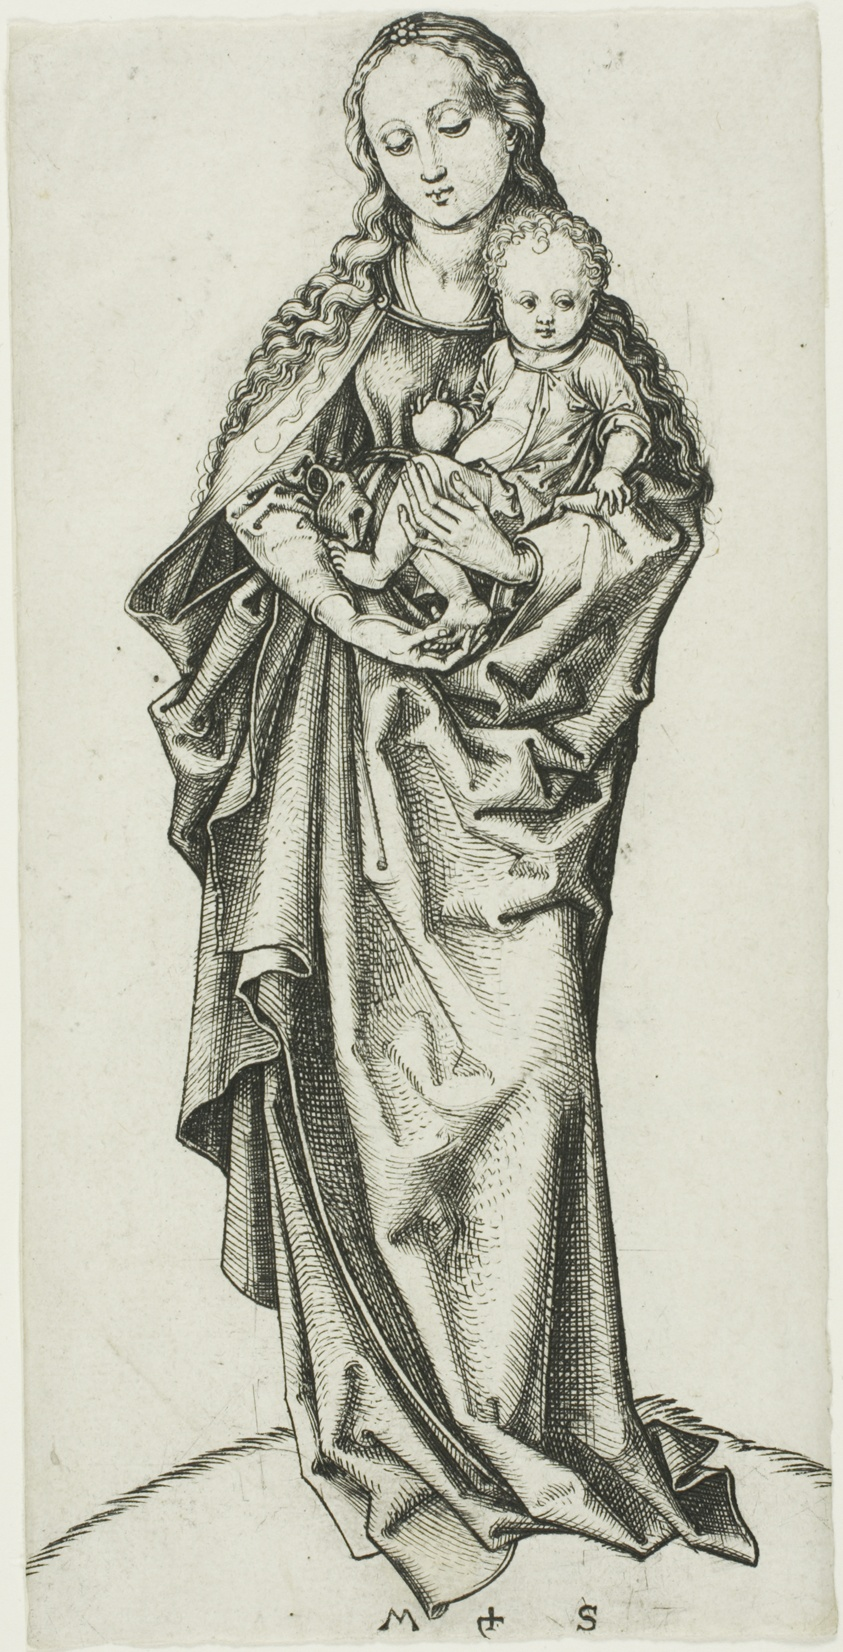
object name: Print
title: The Madonna and Child with an Apple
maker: Martin Schongauer (German, c. 1430/50-1491)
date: c. 1475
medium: Engraving on paper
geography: Germany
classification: engraving; print; prints and drawing